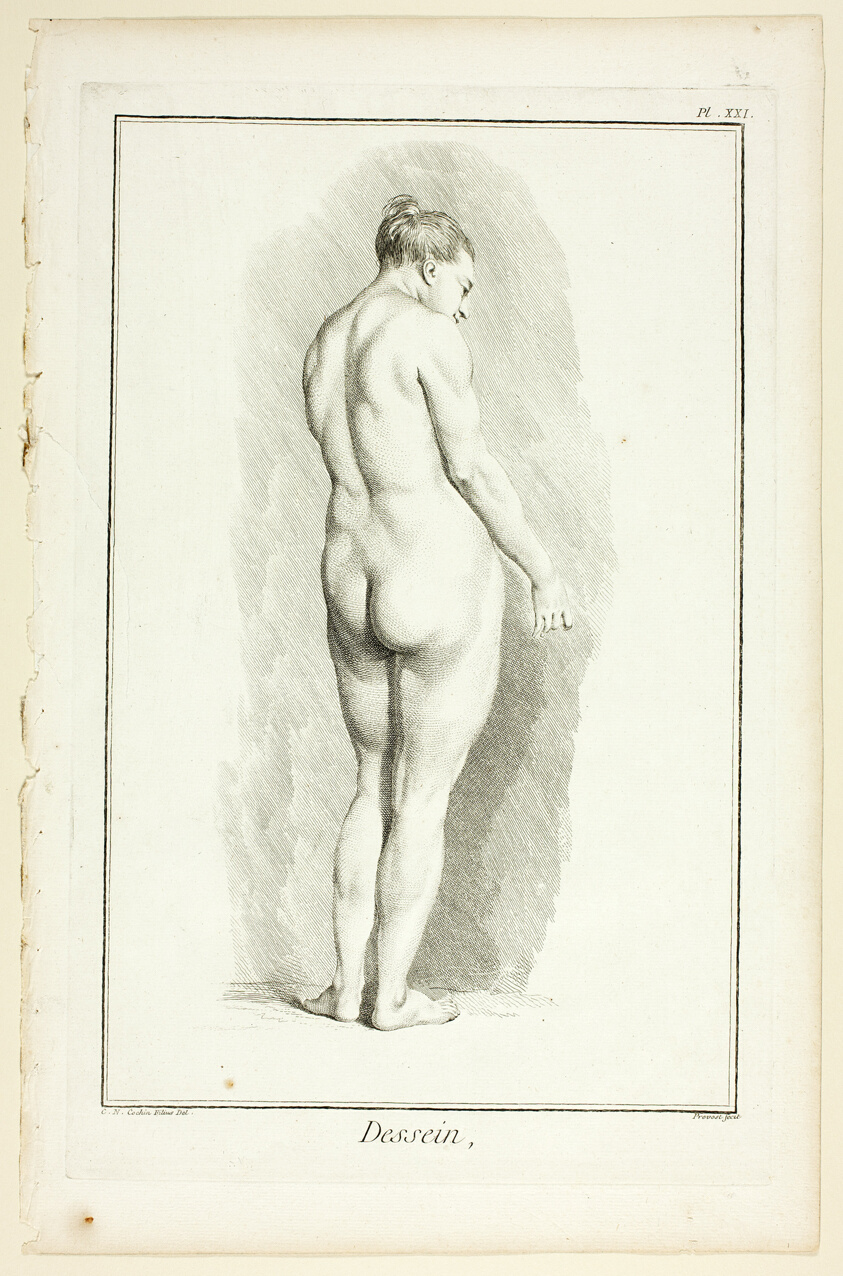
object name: Print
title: Design: Figure from Encyclopédie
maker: Benoît-Louis Prévost (French, c. 1735-1809); after Charles-Nicholas Cochin, the younger (French, 1715-1790); published by André le Breton (French, 1708-1779), Michel-Antoine David (French, c. 1707-1769), Laurent Durand (French, 1712-1763), and Antoine-Claude Briasson (French, 1700-1775)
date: 1762/77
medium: Etching, with engraving, on cream laid paper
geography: France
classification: etching; print; prints and drawing